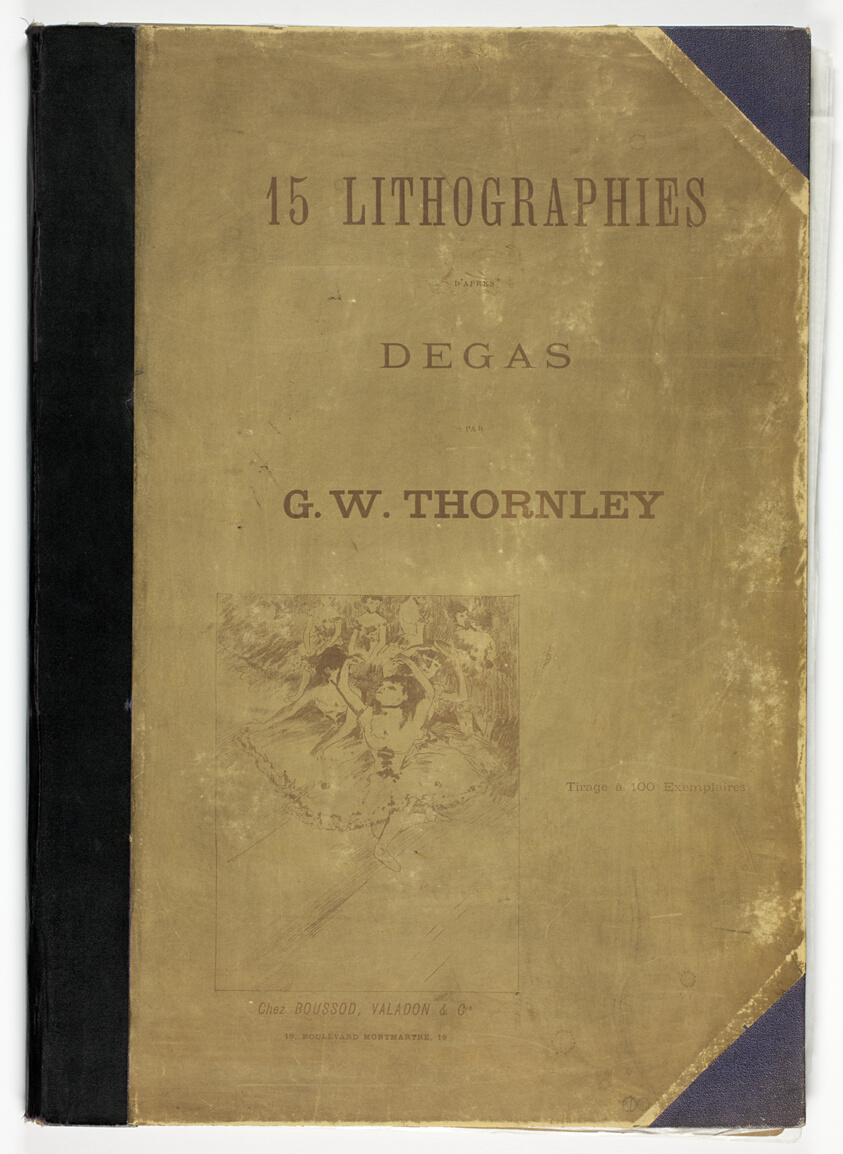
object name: Print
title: Thornley Portfolio Cover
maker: Georges-William Thornley (French, 1857-1935); after Edgar Degas (French, 1834-1917); printed by Atelier Becquet (French, 19th century); published by Boussod, Valadon, & Company (French, 18th-19th century)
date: 1889–90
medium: Portfolio cover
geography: France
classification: portfolio cover; lithograph; print; prints and drawing; portfolio